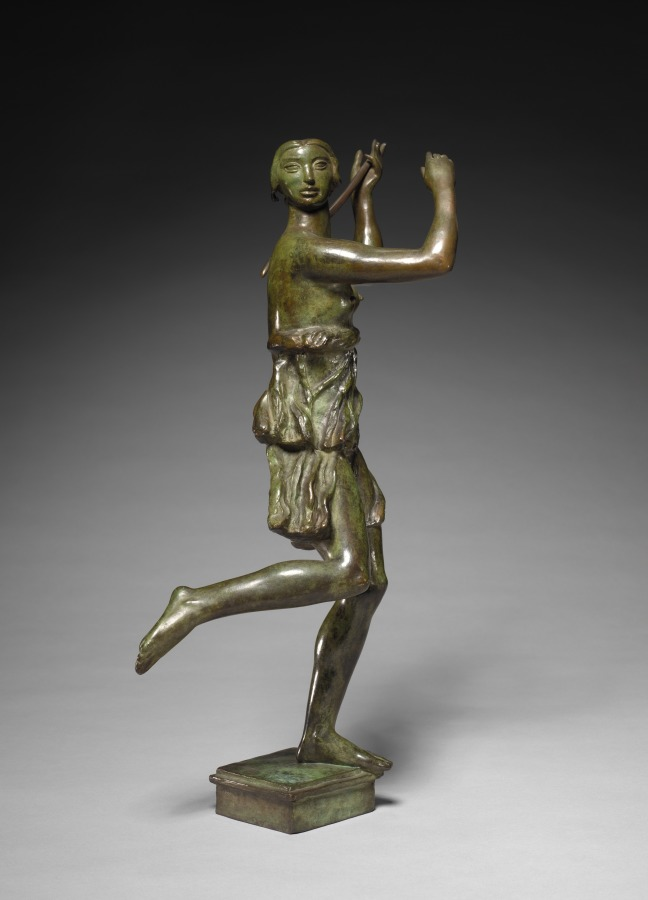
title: Diana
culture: Sweden, 20th century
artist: Carl Milles (Swedish, 1875–1955)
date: 1927–1928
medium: bronze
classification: Sculpture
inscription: Signed on back of base: "Milles"